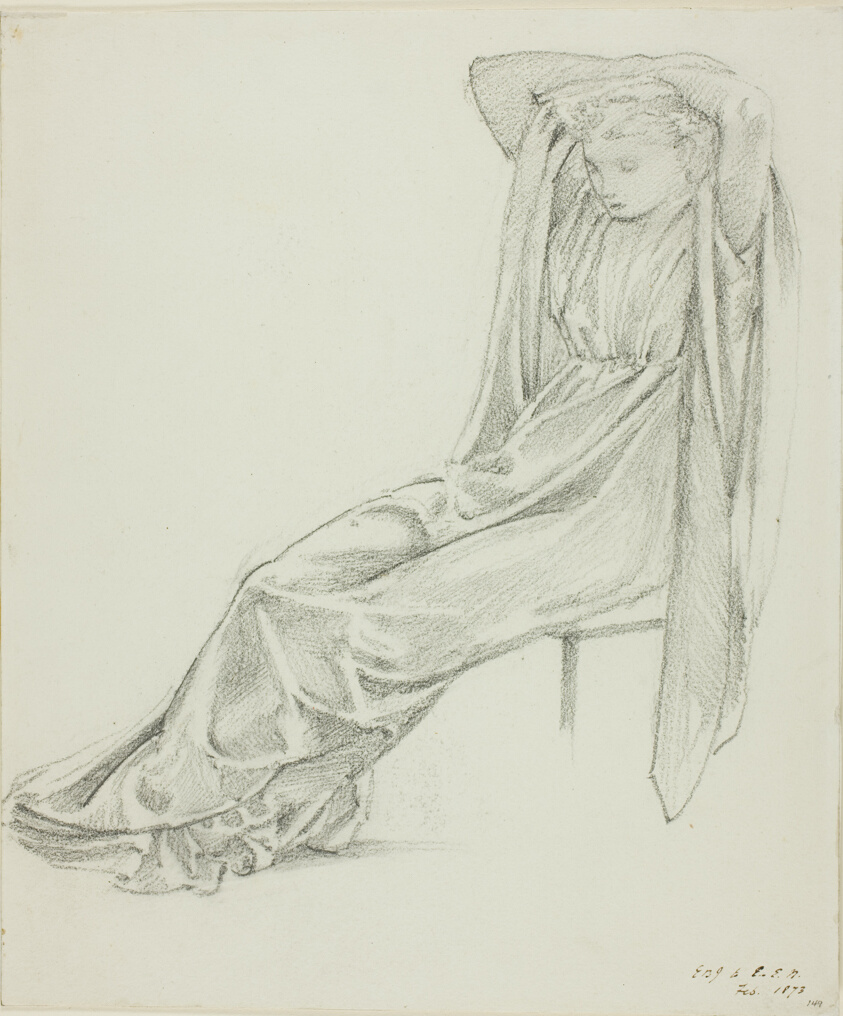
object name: Drawing and Watercolor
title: Seated Female Figure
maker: Sir Edward Burne-Jones (English, 1833-1898)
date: 1873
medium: Graphite on ivory wove paper, laid down on ivory wove card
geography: England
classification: chalk; drawings (visual works); prints and drawing